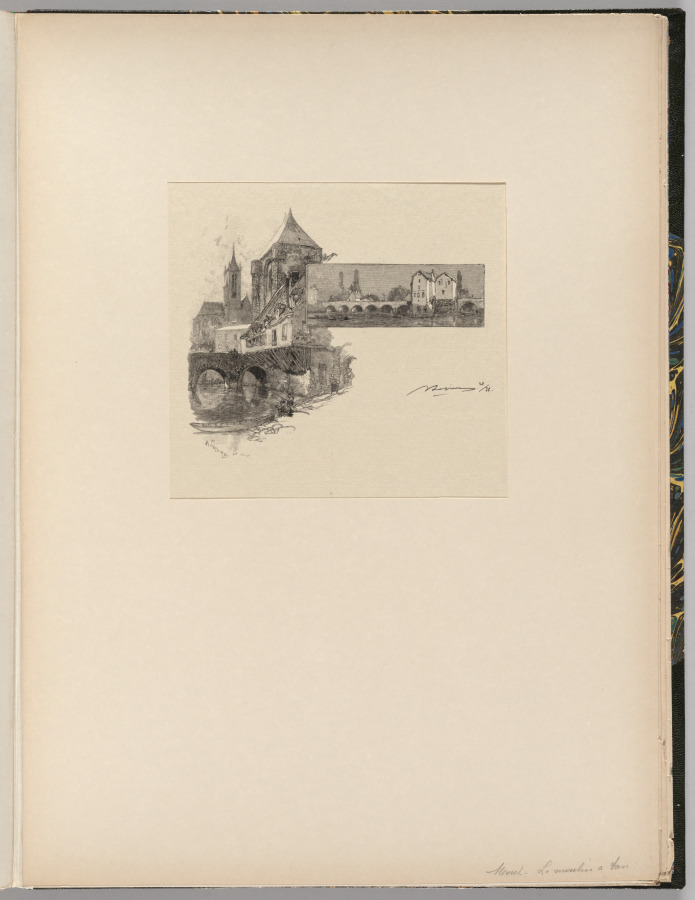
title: Fontainebleau Forest: Moret, the Wood-Mill (La Forêt de Fontainebleau: Moret, la porte de Montereau, le moulin à tan)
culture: France, 19th century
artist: Auguste Louis Lepère (French, 1849–1918)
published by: A. Desmoulins, Published in Revue Illustrée, 1887–90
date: 1890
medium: wood engraving from bound volume of 34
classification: Bound Volume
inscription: In block, left: A. LEPÈRE. Del. sc; below image, lower right, in black ink: ALepère 22/35; on window mat, lower right, in graphite Moret - Le moulin a tan